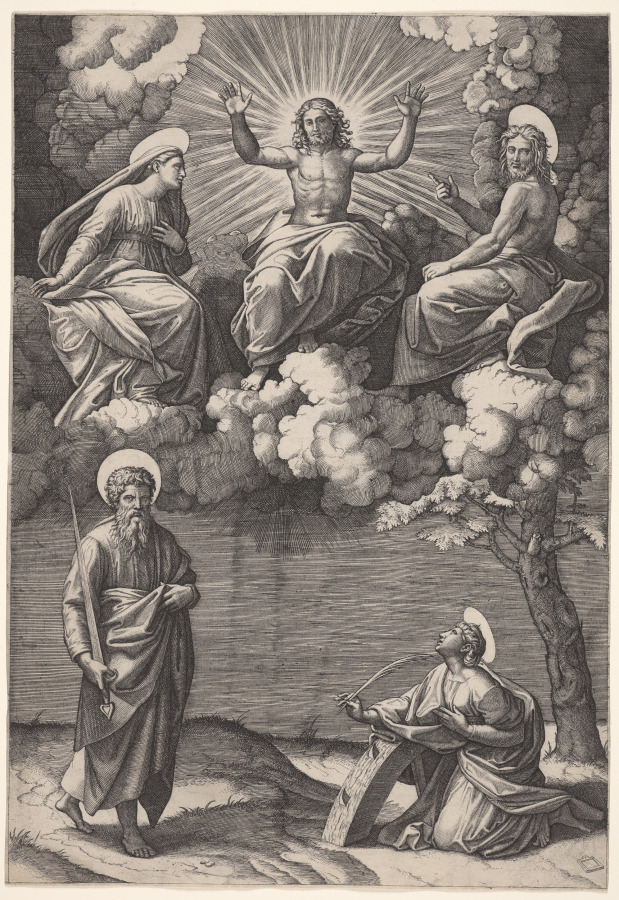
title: Christ, the Virgin, and St. John the Baptist with Saints Paul and Catherine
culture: Italy, 16th century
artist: Marcantonio Raimondi (Italian, 1470/82–1527/34)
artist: after Raphael (Italian, 1483–1520)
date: c. 1520–25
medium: engraving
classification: Print